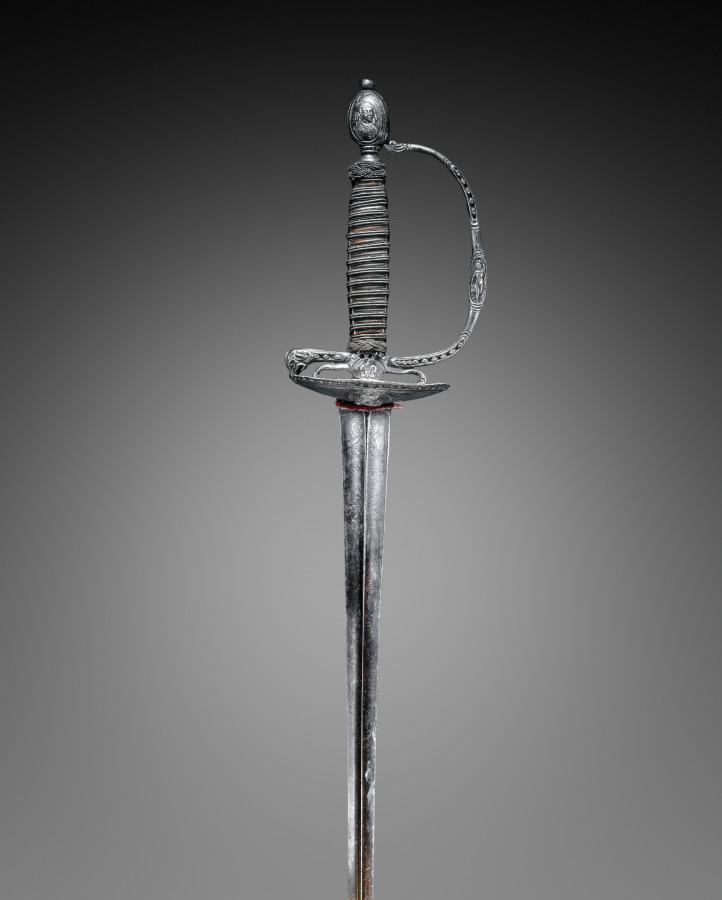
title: Small Sword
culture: France, late 17th Century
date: late 1600s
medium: steel, chiseled and pierced; iron, wood; wire-bound grip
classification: Arms and Armor